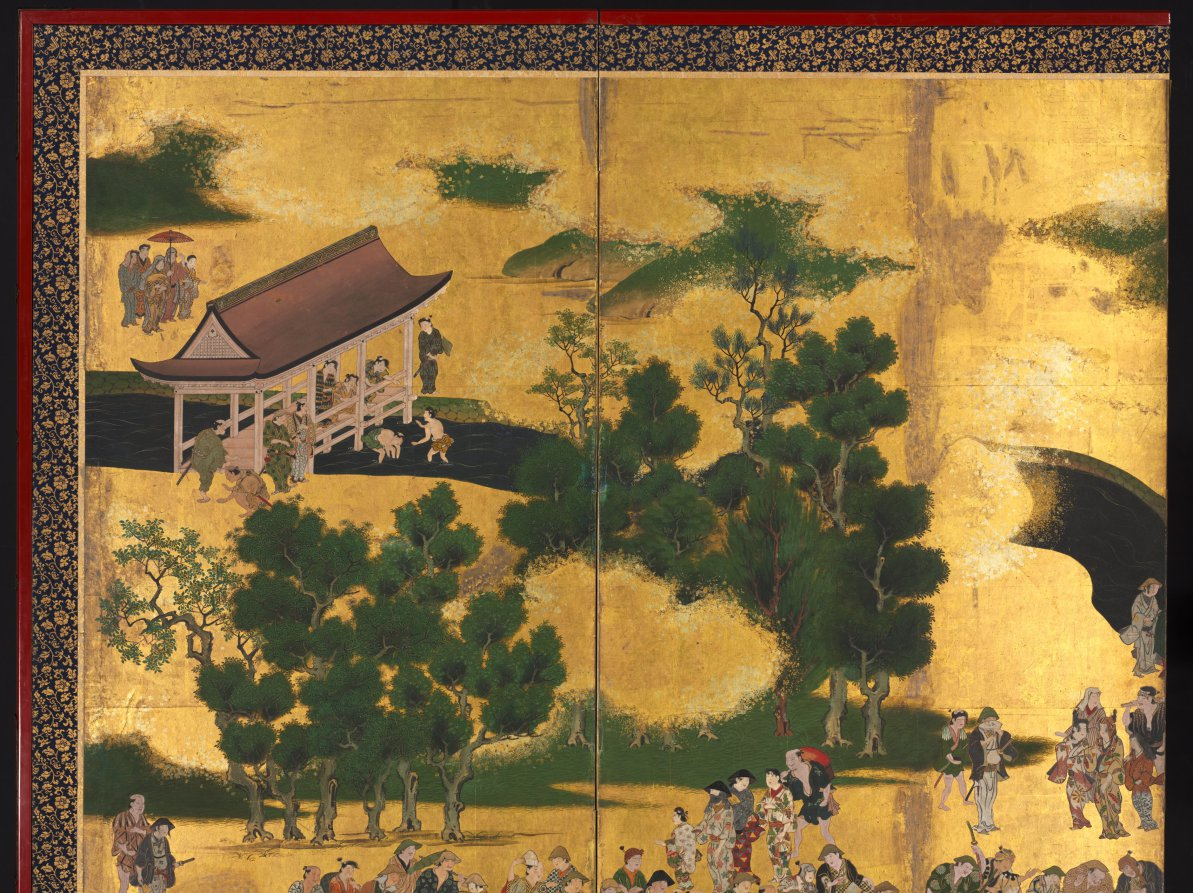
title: Horse Race at the Kamo Shrine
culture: Japan, Edo period (1615–1868)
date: early to mid-1600s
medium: One of a pair of six-panel folding screens; ink and color on gilded paper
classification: Painting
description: Kamo Shrine in Kyoto, seen in the upper half of the left screen, has held an annual horse race on May 5th since the ninth century. Serving as a snapshot of the festivities, this pair of screens captures nearly 600 people watching the race, beginning at the bottom part of the right screen and continuing to the left. The race is a great spectacle where aristocratic riders cling to their fast and unwieldy mounts. While many of those in attendance seem in rapt attention to the main event, other vignettes depict people engaged in an array of activities. This pair of screens was likely originally part of a group of linked murals.